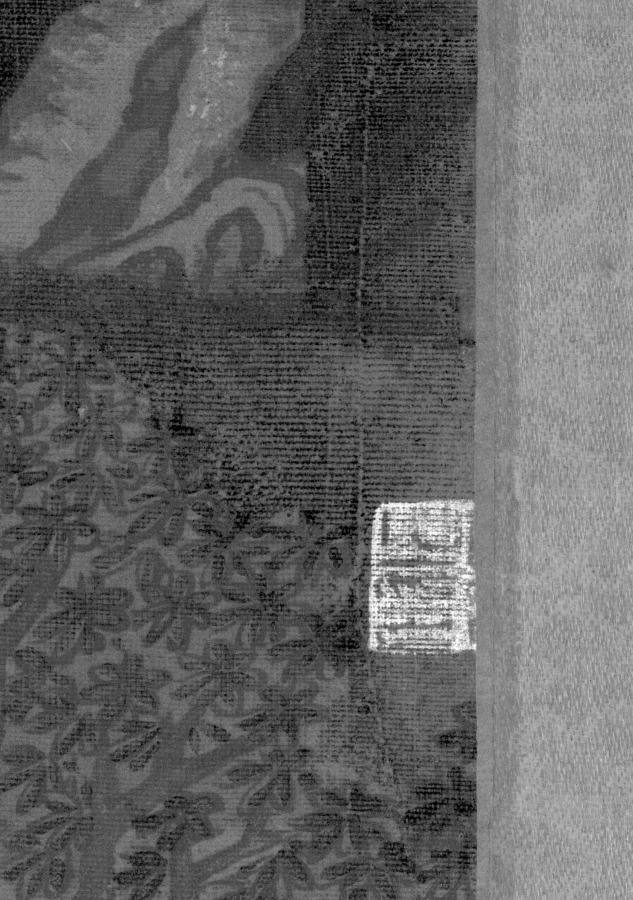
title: Court Ladies in the Imperial Palace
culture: China, Yuan dynasty (1271-1368)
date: 1271–1368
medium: hanging scroll, color on silk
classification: Painting